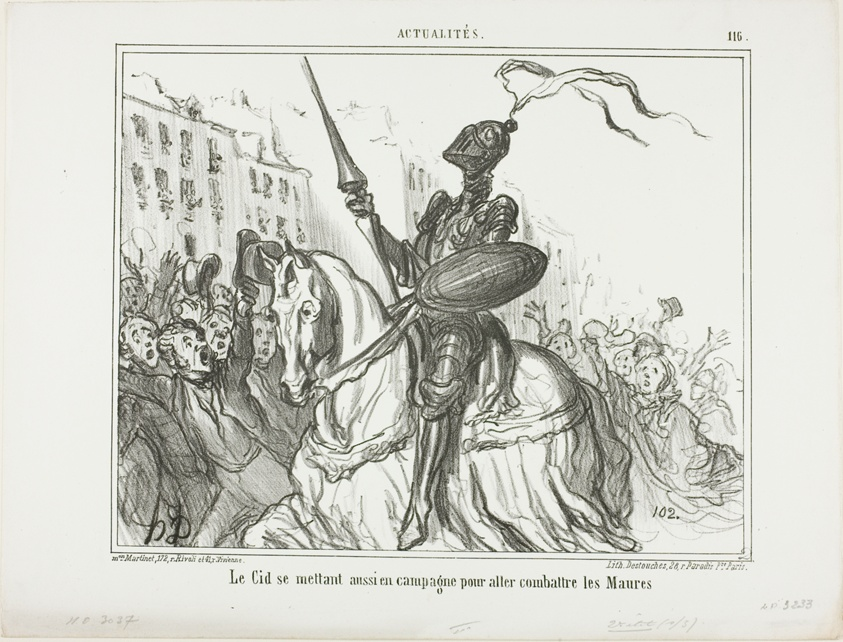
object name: Print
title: El Cid also takes to the field to fight against the Moors, plate 116 from Actualités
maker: Honoré Victorin Daumier; French, 1808-1879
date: 1859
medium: Lithograph in black on white wove paper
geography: France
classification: lithograph; print; prints and drawing